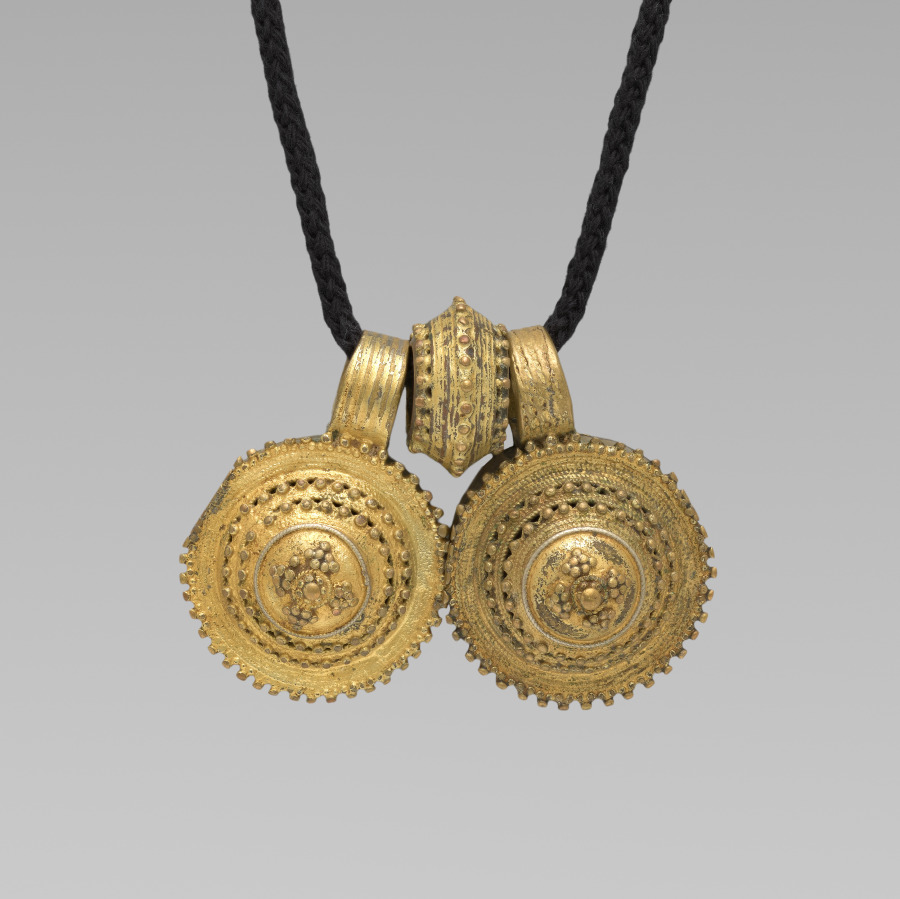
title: Necklace (ashän ketab) with amulet pendants (tälsäm) and bead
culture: Africa, East Africa, Ethiopia, unknown silversmith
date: late 1800s or early 1900s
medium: mercury-gilded copper alloy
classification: Jewelry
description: Ornate filigree jewelry was historically made in Ethiopia for royals and nobility by specialized silversmiths trained through long apprenticeships. This gold-washed silver necklace is composed of numerous box-shaped amulet pendants (tälsäm) meant to ward off the evil eye or other dangers. Linked to Islamic amuletic practices, the boxes are effective whether empty or whether they contain magical or prayerful texts. Their fine filigree and granulation work is characteristic of Harar as well as the Ethiopian Orthodox Christian city of Aksum.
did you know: Gold and silver jewelry has been made in Ethiopia for at least 2000 years.